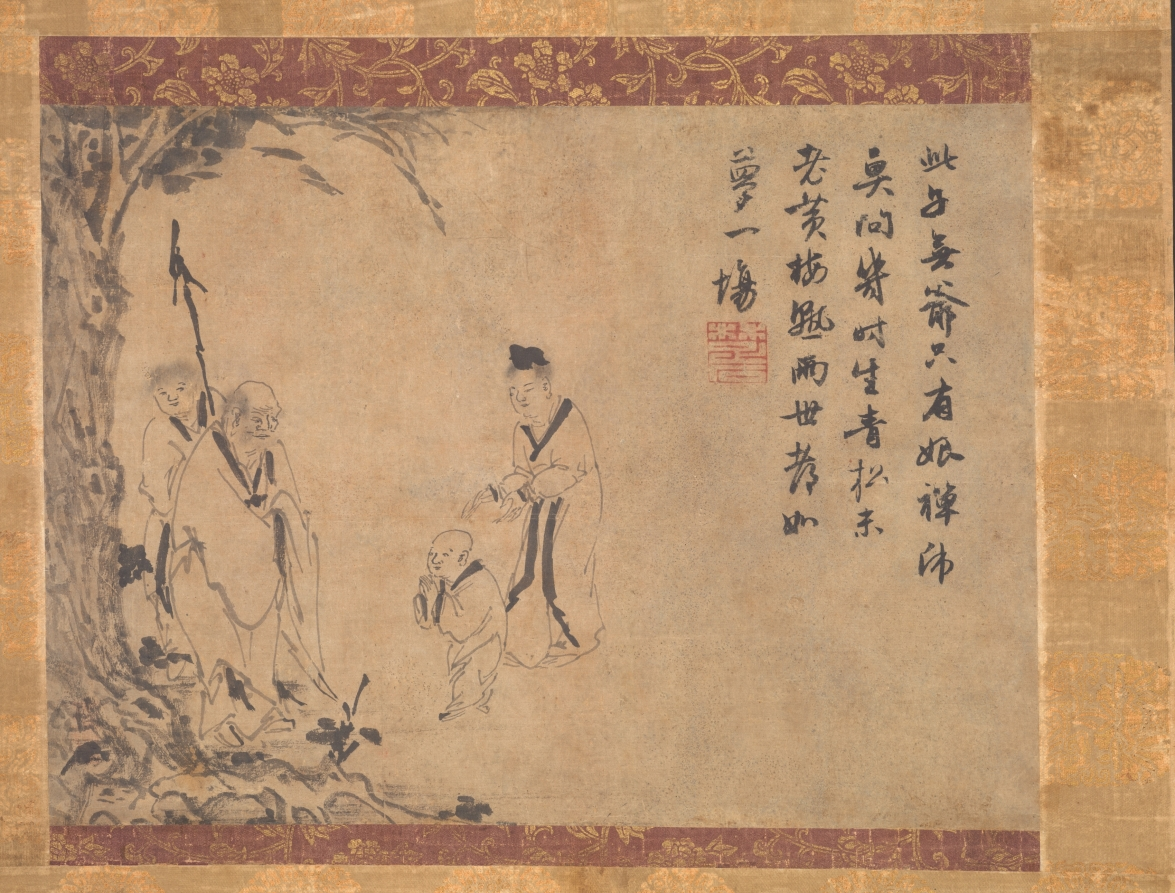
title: The Second Coming of the Fifth Patriarch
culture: China, Yuan dynasty (1271-1368)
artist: Yintuoluo (Chinese, c. 1285-c. 1355)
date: c. mid-1300s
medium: section of a handscroll mounted as a hanging scroll, ink on paper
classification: Painting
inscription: [印] 人言洞裡桃花源，未必人間有此枝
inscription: 此子無爺只有娘，禪師莫問幾時生。 青松未老黃梅飄，兩世都如夢一場。 [印] 楚石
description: A small boy, accompanied by his mother, is closing his hands in greeting to an old monk who has a young attendant standing behind him. Scholars believe the scene is a meeting between the fourth patriarch of Chan Buddhism, Daoxin 道信, and the little boy, who was the reincarnation of an old monk named Zaisong daozhe 栽松道者 (Pine Planter). They had encountered before, during which Daoxin advised the Pine Planter to endure a reincarnation as he was too old to reach enlightenment. This painting is done by Yintuoluo, an artist renowned for his simple and unadorned style.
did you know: This painting is just a section of a handscroll that has been remounted as a hanging scroll.